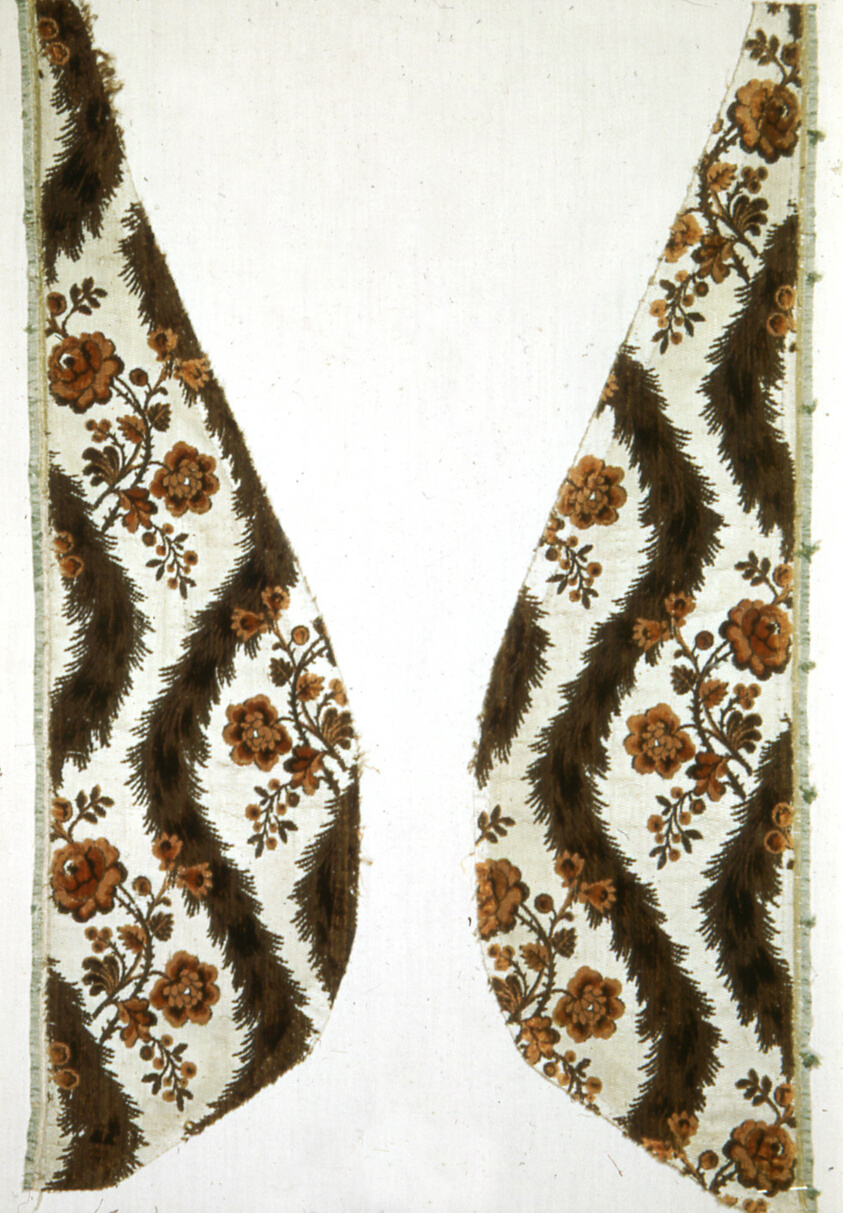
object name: Textile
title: Fragment (From a Chasuble)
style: louis xv, european, louis xvi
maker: France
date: c. 1760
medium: Silk; velvet: cut, uncut, pile-on-pile, and voided; against warp-faced plain weave foundation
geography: France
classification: textile; weaving - velvet; weaving; liturgical